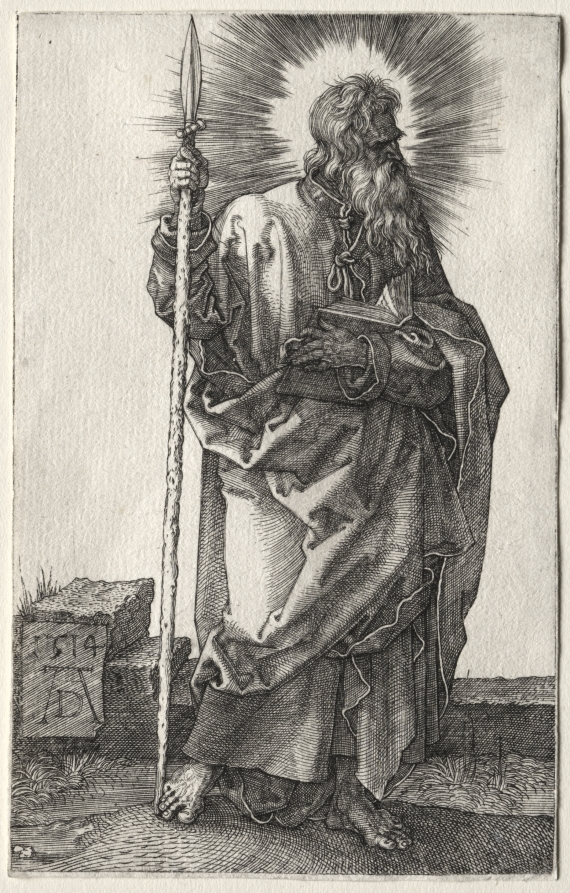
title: The Apostle Thomas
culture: Germany, late 15th-early 16th century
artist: Albrecht Dürer (German, 1471–1528)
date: 1514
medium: engraving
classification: Print